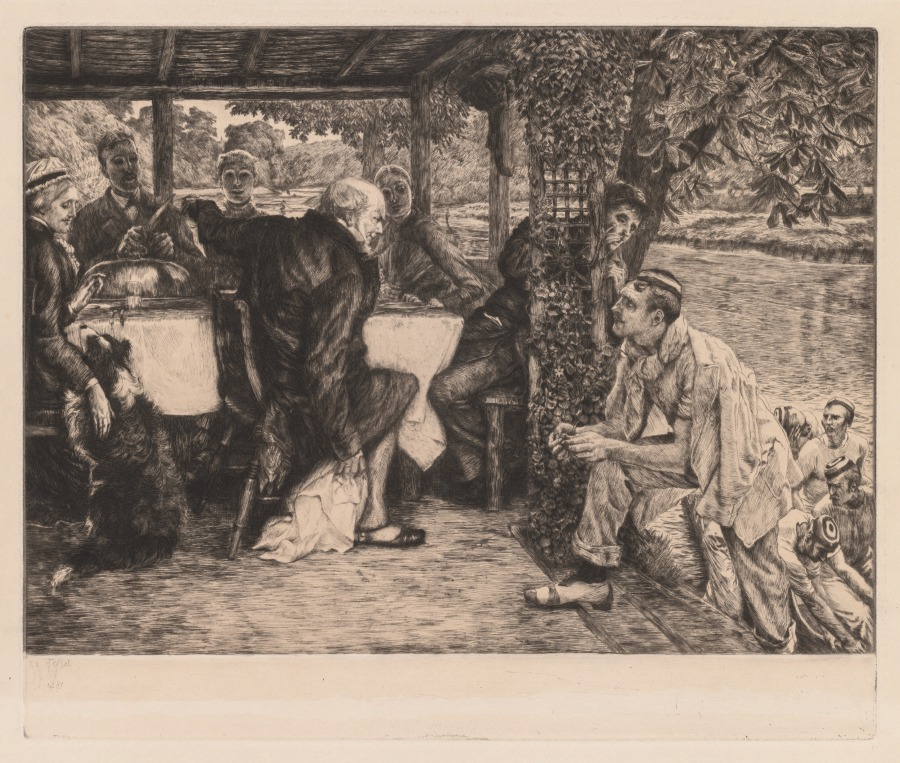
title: The Prodigal Son: The Fatted Calf (L’enfant prodigue: le veau gras)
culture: France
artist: James Tissot (French, 1836–1902)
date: 1881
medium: etching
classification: Print